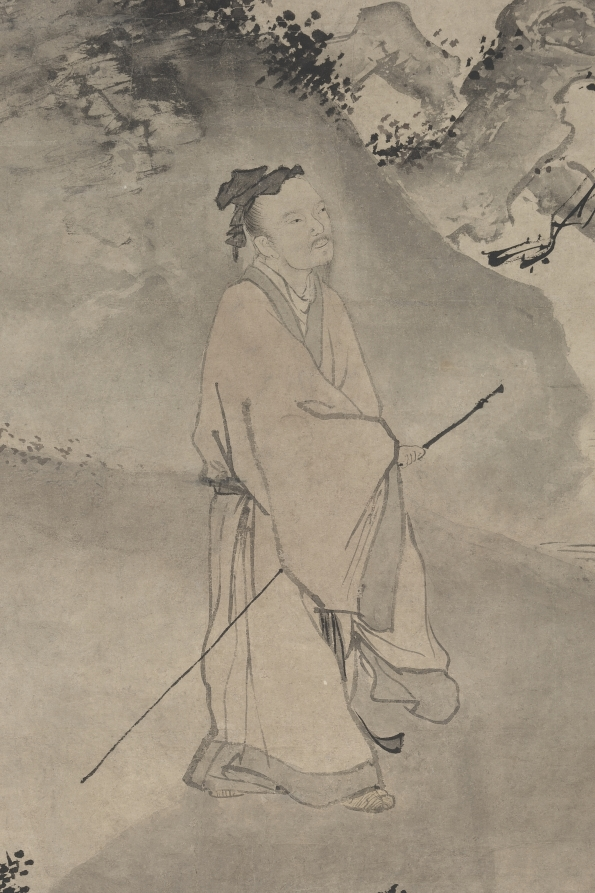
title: The Poet Lin Bu Wandering in the Moonlight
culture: China, Ming dynasty (1368–1644)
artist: Du Jin (Chinese, 1446-c. 1519)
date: late 1400s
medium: Hanging scroll; ink and color on paper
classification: Painting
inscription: 陪月閒行杖屨遲，半醒時節更相宜。 吟成疏影寒香句，為問梅花知不知。 檉居杜堇 [印]一書生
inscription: 1 seal of Zhang Heng 張珩 (1915–1963)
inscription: 1 seal of C. C. Wang [Wang Jiqian] 王季遷 (1907–2003)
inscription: 1 unidentified seal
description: Lin Bu (967–1028), a Northern Song (960–1127) poet and hermit who lived at the West Lake in Hangzhou, was known for having plum trees for his female companions and cranes for his children. This hanging scroll depicts the poet walking in the moonlight and looking at the plum tree, a scene described in his most well-known poem on plum blossoms. Surviving works signed by Du Jin are rare and this painting is one of them. Here, the artist used lively brushwork to depict the plum tree and rocks, exemplified in varying dots and strokes, and sweeps in different shades of ink.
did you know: Lin Bu withdrew from prestigious government service and lived as a hermit by the West Lake in Hangzhou.